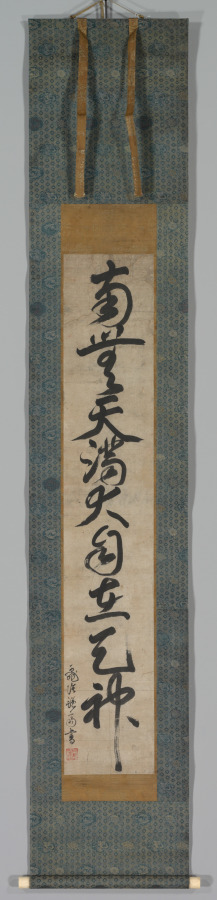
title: Sacred Name of Tenjin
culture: Japan, Muromachi period (1392–1573)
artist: Sakugen Shūryō (Japanese, 1501–1579)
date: 1500s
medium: hanging scroll; ink on paper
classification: Calligraphy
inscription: signed: signature unread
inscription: Sealed: Sakugen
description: The story emerged in the early 1300s that the kami Tenjin had traveled to China and achieved enlightenment under a famous Buddhist meditation master. Paintings of the subject as well as written invocations of Tenjin’s name were highly valued by the monks of Japan’s Zen Buddhist communities, to which an invocation of Tenjin’s name brushed by Zen monk Sakugen Shūryō attests. Sakugen was both a poet and an official envoy to Ming China in the 1500s. Creating calligraphies of deities’ names was akin to painting religious icons.